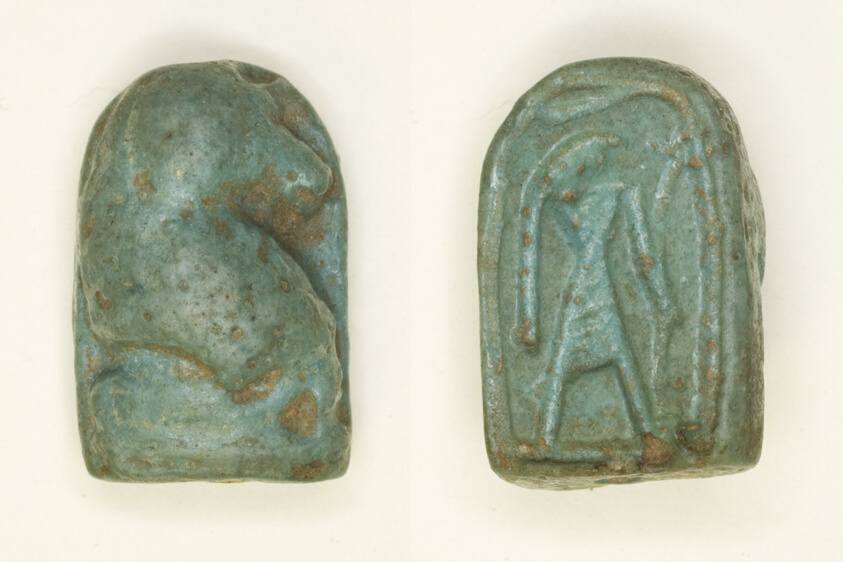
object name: Costume and Accessories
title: Scaraboid: Squatting Baboon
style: new kingdom, ancient, egyptian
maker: Egyptian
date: New Kingdom, Dynasties 18–20 (about 1550–1069 BCE)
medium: Glazed steatite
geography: Egypt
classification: scaraboids; amulet; ancient art; costume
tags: baboon, gods (deities), men, deities